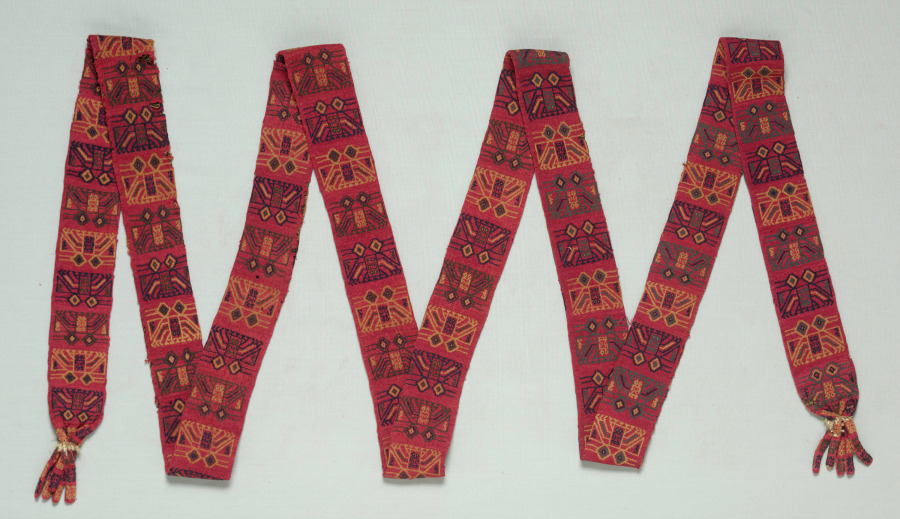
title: Turban Band (Llauto)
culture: Peru, South Coast, Paracas, Late Period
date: c. 300–100 BCE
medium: wool and cotton: needle reseau (netting)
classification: Textile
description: Repeated along the length of this headband is a double-headed bird motif, in which the two heads are seen in profile and joined to a frontal body with outstretched wings. This design also appears in the tunic (1946.227) and mantle (1946.226). These three textiles may have formed a matched set that a socially prominent Paracas man would have worn as an ensemble.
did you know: This headband may form a matched set with a mantle and tunic in the collection.